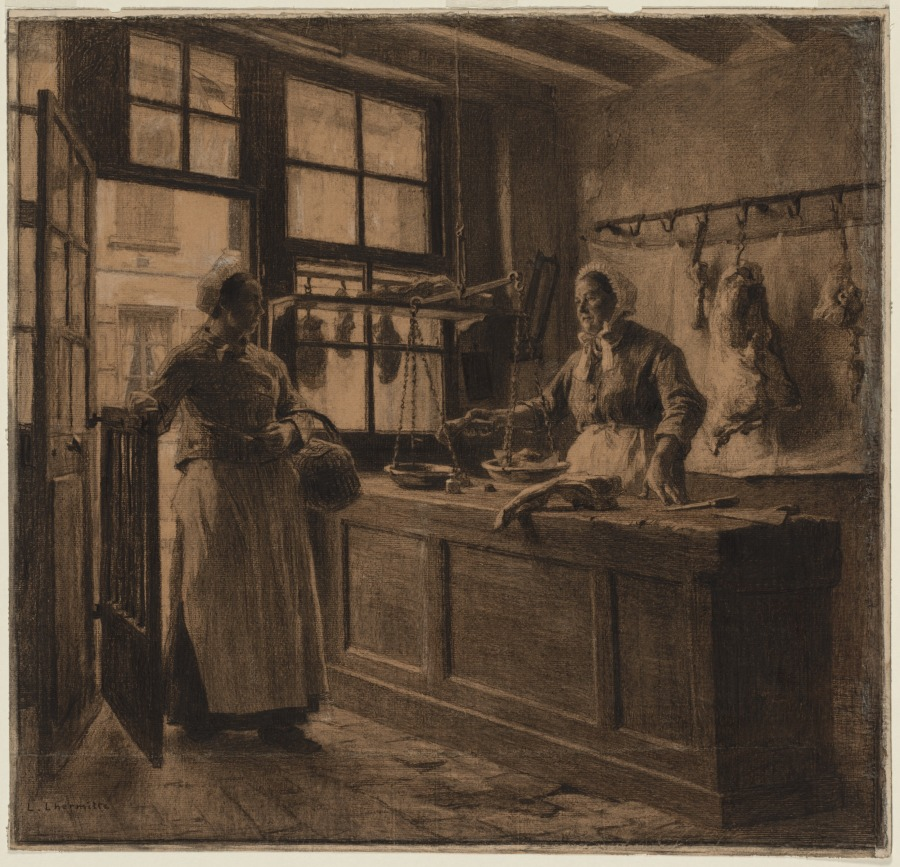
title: Interior of a Butcher Shop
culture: France, 19th century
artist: Léon Augustin Lhermitte (French, 1844–1925)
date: c. 1881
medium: charcoal and black chalk heightened with white chalk (media continue onto secondary support)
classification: Drawing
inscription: signed, lower left, in charcoal: L. Lhermitte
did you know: The French writer Théodore de Banville described Léon Lhermitte's drawings, saying that "In his hands charcoal and black chalk are like magical tools."